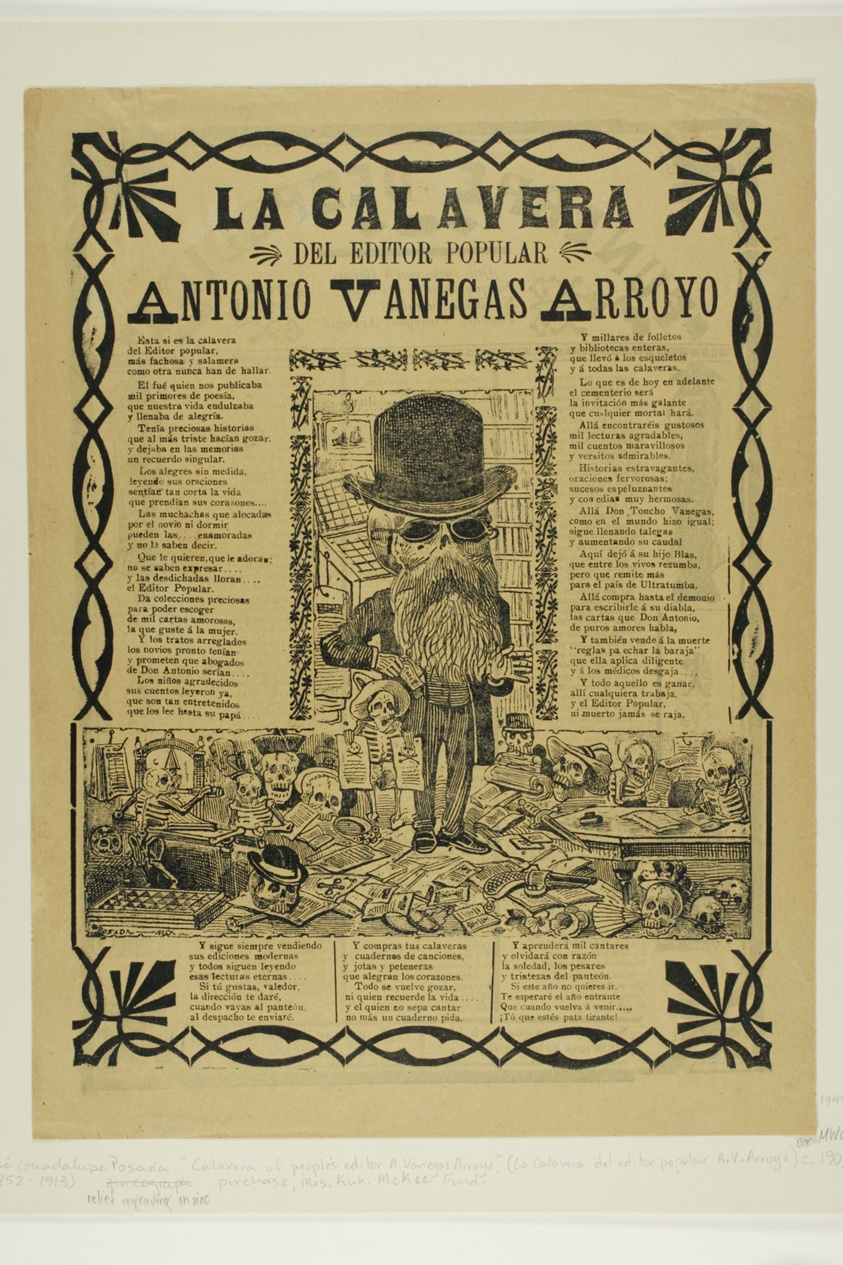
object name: Print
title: The Calavera of the Peoples' Editor Antonio Vanegas Arroyo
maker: José Guadalupe Posada (Mexican, 1852-1913)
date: 1902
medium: Relief engraving on wove paper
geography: Mexico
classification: woodcut; print; prints and drawing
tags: text